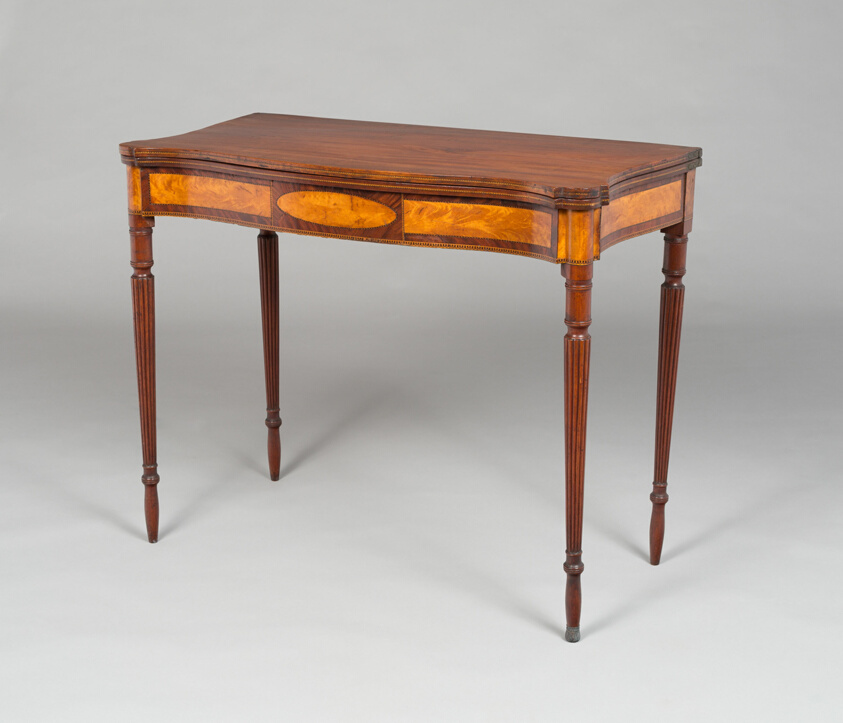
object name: Furniture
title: Card Table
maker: Artist unknown (American, 19th century); Salem, Massachusetts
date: 1800–15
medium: Mahogany with birch veneers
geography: Salem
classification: table; furniture; american decorative arts; american arts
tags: furniture